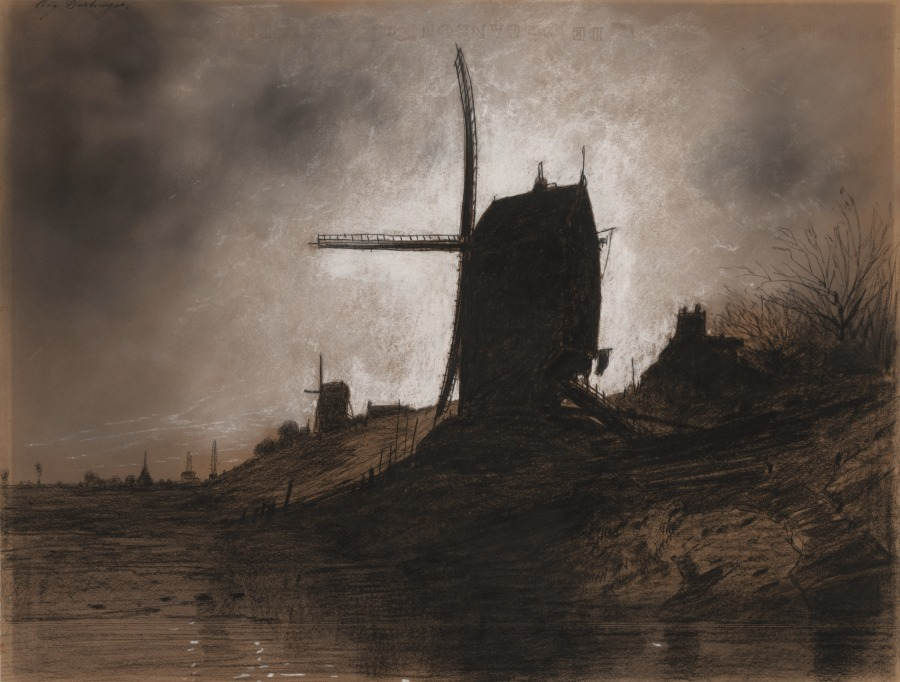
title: Windmills in a Landscape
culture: France, 19th century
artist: Eugene Deshayes (French, 1828–1890)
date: c. 1850–90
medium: charcoal with white heightening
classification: Drawing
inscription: inscribed in black chalk, upper left : "Eug. Deshayes"